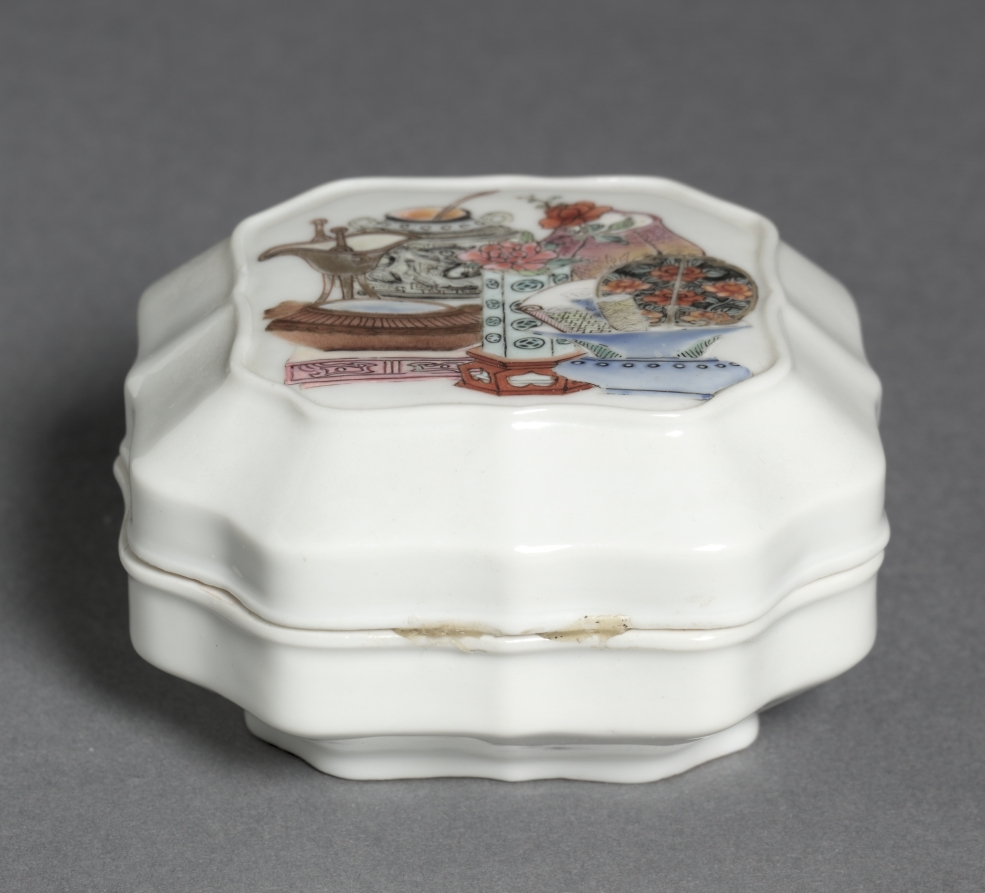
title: Square Covered Box with Hundred Antiquities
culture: China, Jiangxi Province, Jingdezhen kilns, Qing dynasty (1644–1911), Yongzheng mark and reign (1723–35)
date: 1723–35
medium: porcelain with famille rose overglaze enamel decoration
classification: Ceramic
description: The painted decoration in this box cover provides an interesting image of the antiquities and objects being collected in the Chinese scholar’s desk—all of which are emblems of taste, status, and affluence. Connoisseurship, art cataloguing, art historical study, and elegant social gatherings developed alongside art collecting as part of the Chinese literati culture.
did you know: An auspicious lingzhi mushroom was painted on the base.